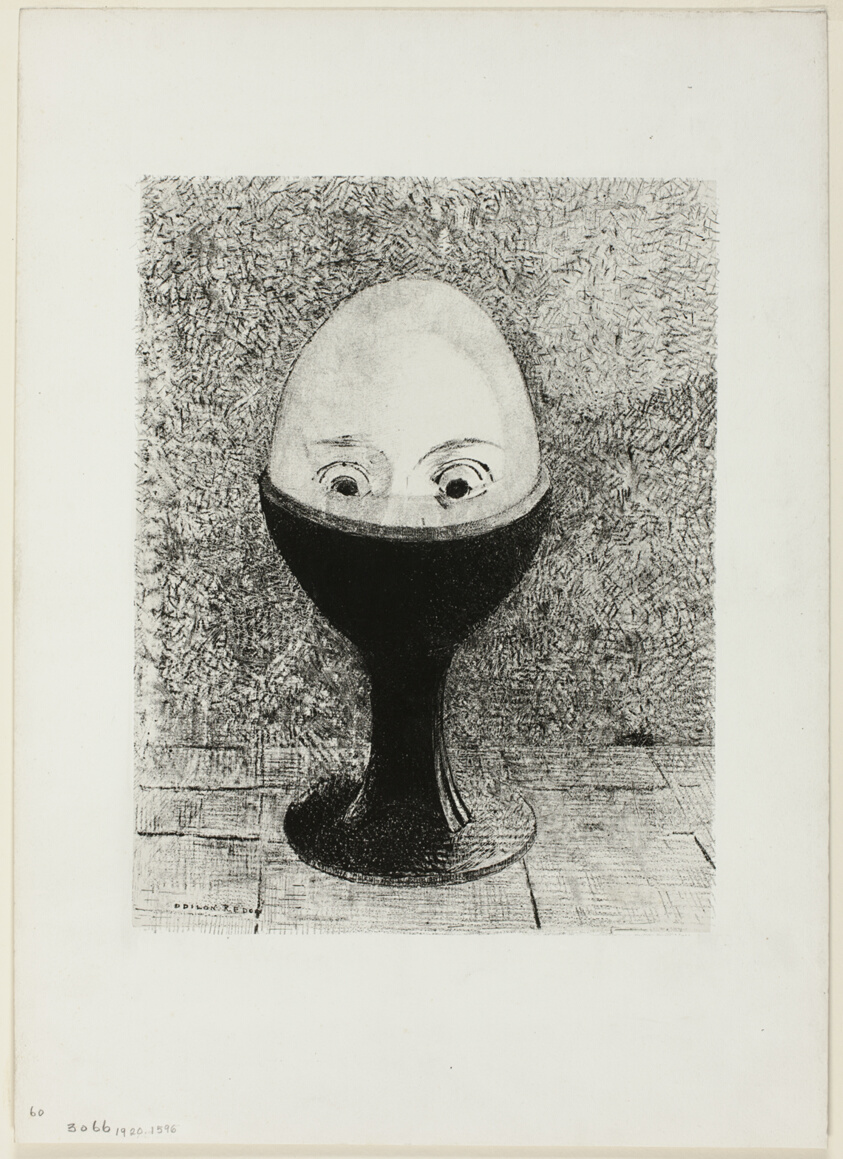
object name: Print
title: The Egg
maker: Odilon Redon (French, 1840-1916)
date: 1885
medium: Lithograph in black on ivory China paper laid down on ivory wove paper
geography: France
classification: lithograph; print; prints and drawing; paper